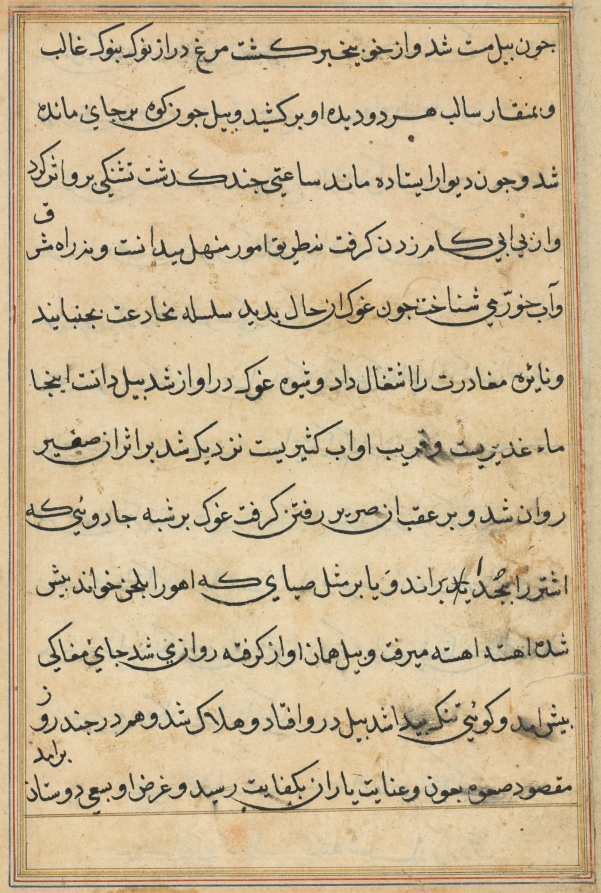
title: Page from Tales of a Parrot (Tuti-nama): text page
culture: Mughal India, court of Akbar (reigned 1556–1605)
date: c. 1560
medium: gum tempera, ink, and gold on paper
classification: Painting